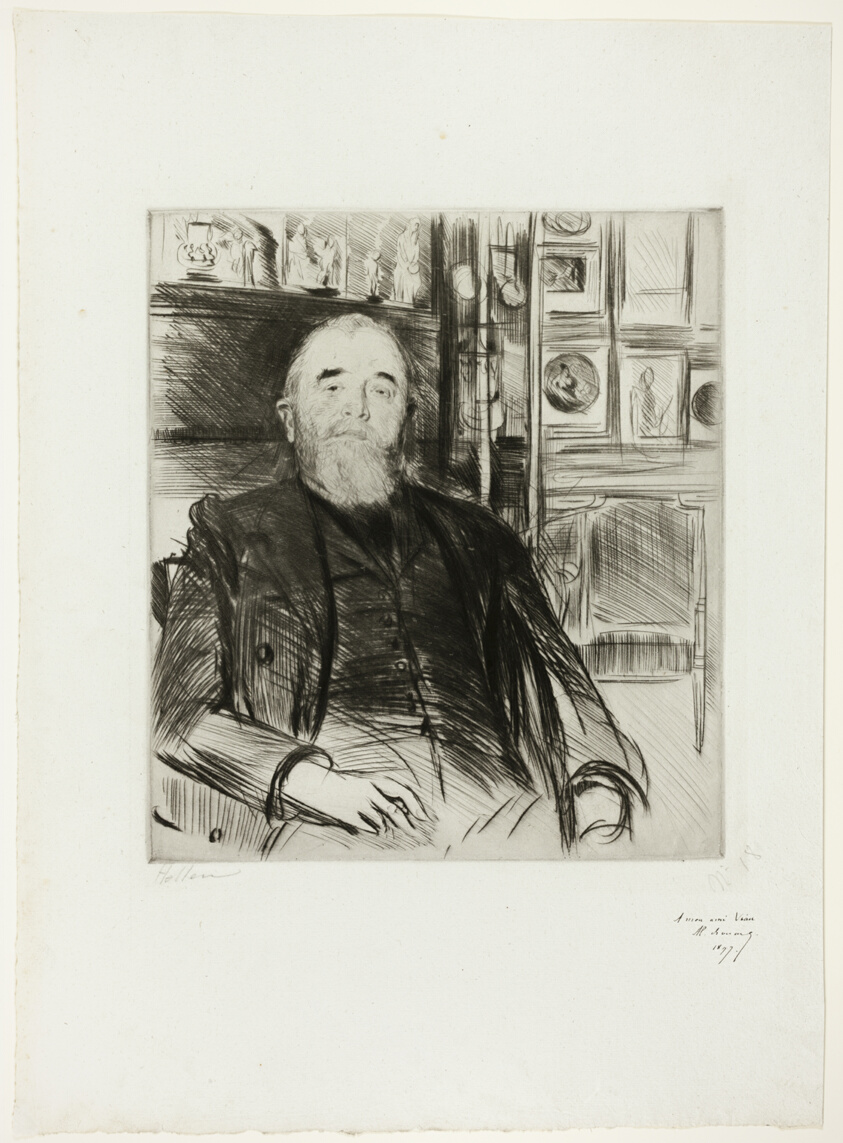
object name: Print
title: Portrait of Alexis Rouart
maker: Paul-César Helleu (French, 1859-1927)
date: 1897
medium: Drypoint with engraving in black on cream laid paper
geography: France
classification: drypoint; print; prints and drawing